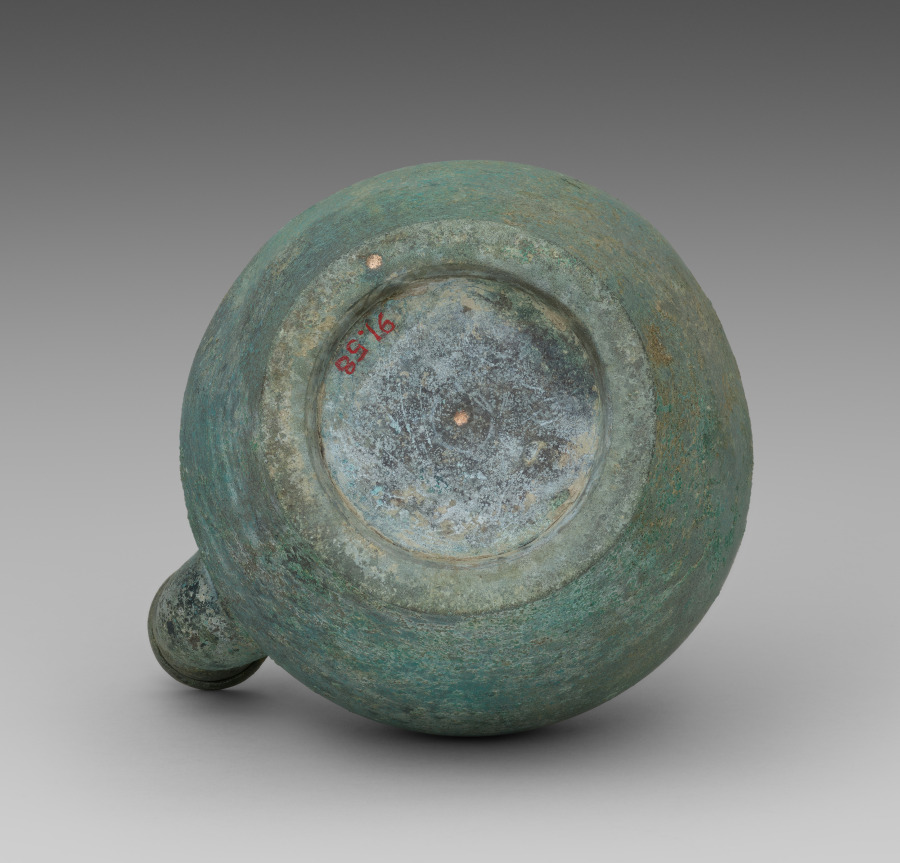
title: Water Ewer for Rituals (Kundika)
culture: Korea, Goryeo dynasty (918–1392)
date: 1100s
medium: bronze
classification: Metalwork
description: Known as kundika in Sanskrit, this distinctively shaped vessel served to purify a sacred space and to invoke a deity. In Korean Buddhist art, it appears primarily as an attribute of the Bodhisattva Avalokitesvara (Gwaneum in Korean). By the 1100s, however, the kundika was used as aristocrats’ fancy water container for everyday use.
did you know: This distinctively shaped vessel is called a kundika in Sanskrit, simply referring to a water bottle.